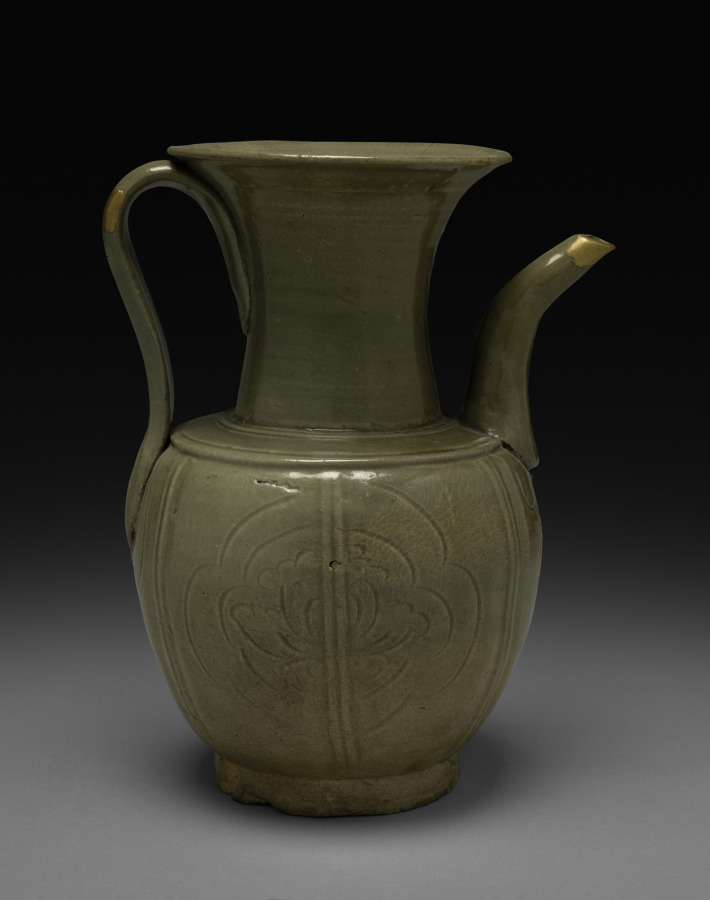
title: Wine Jug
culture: China, Zhejiang province, Shang-lin-hu type, Five dynasties (907–960) to Song dynasty (960–1279)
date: 900s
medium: glazed gray stoneware, Yue ware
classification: Ceramic